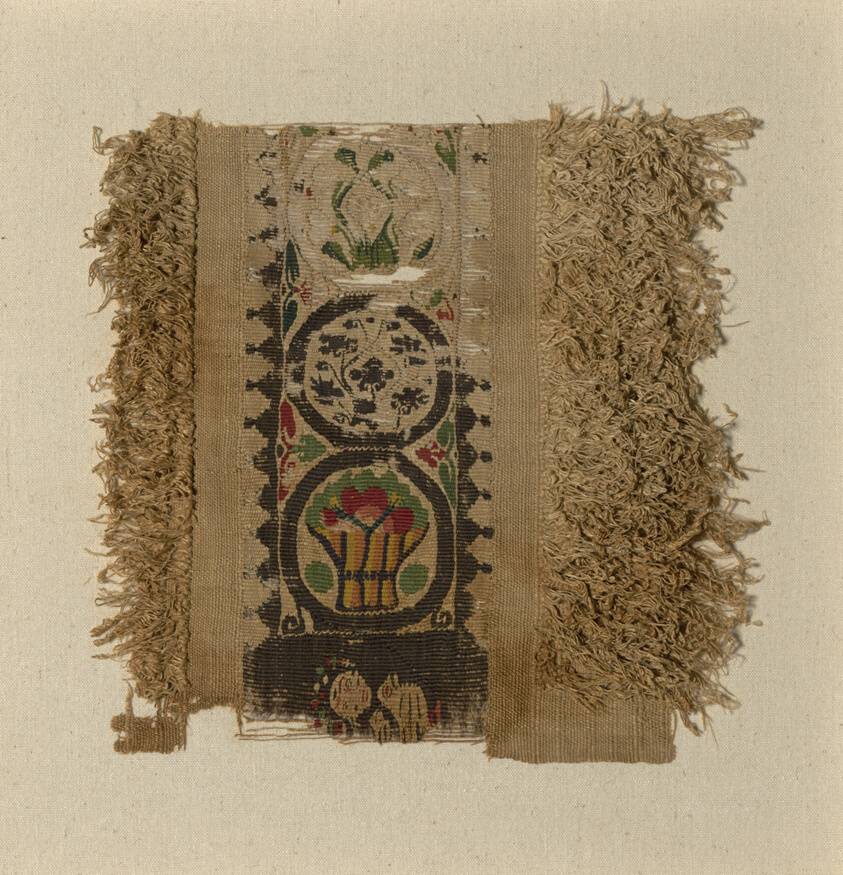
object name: Textile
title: Fragment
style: roman period (egyptian)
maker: Coptic (Egypt)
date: Roman period (30 B.C.– 641 A.D.), 5th/6th century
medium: Linen and wool, plain weave with supplementary wrapping wefts forming uncut loop pile and insets of slit and dovetailed tapestry weave with eccentric and supplementary wrapping weft details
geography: Egypt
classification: textile; weaving